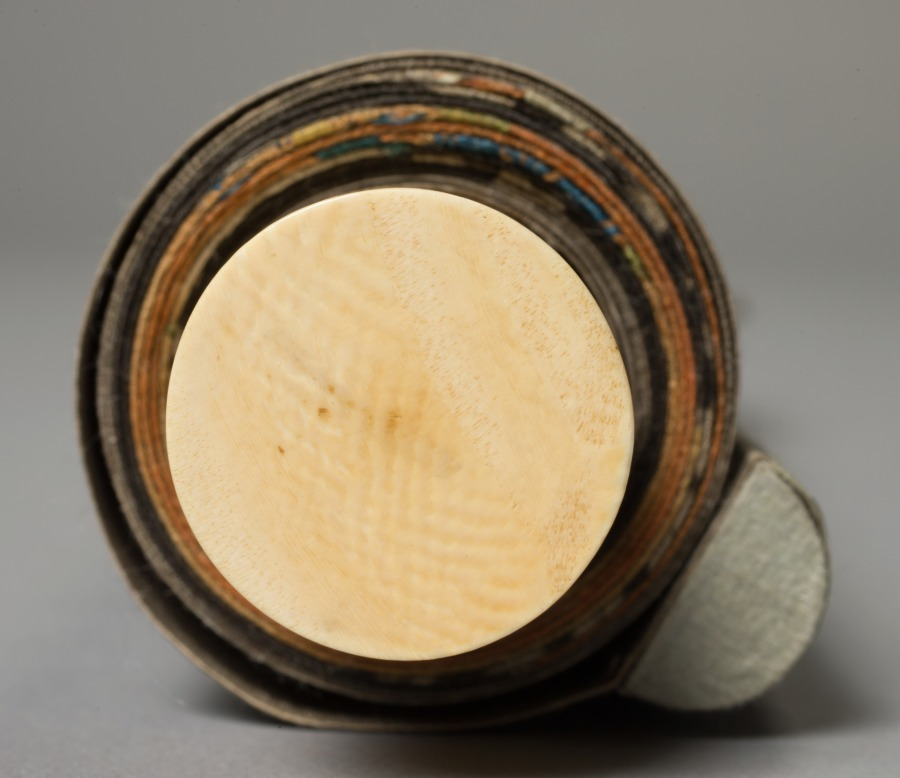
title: Pheasant and Grasses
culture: Japan, Edo period (1615–1868)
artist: attributed to Ogata Kōrin (Japanese, 1658–1716)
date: late 1600s–early 1700s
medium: hanging scroll; ink and color on paper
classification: Painting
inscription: two seals of artist, lower right.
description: Korin was a founder of the Rimpa (decorative) school of painting and was a keen observer of nature. The pheasant is often associated with autumn.